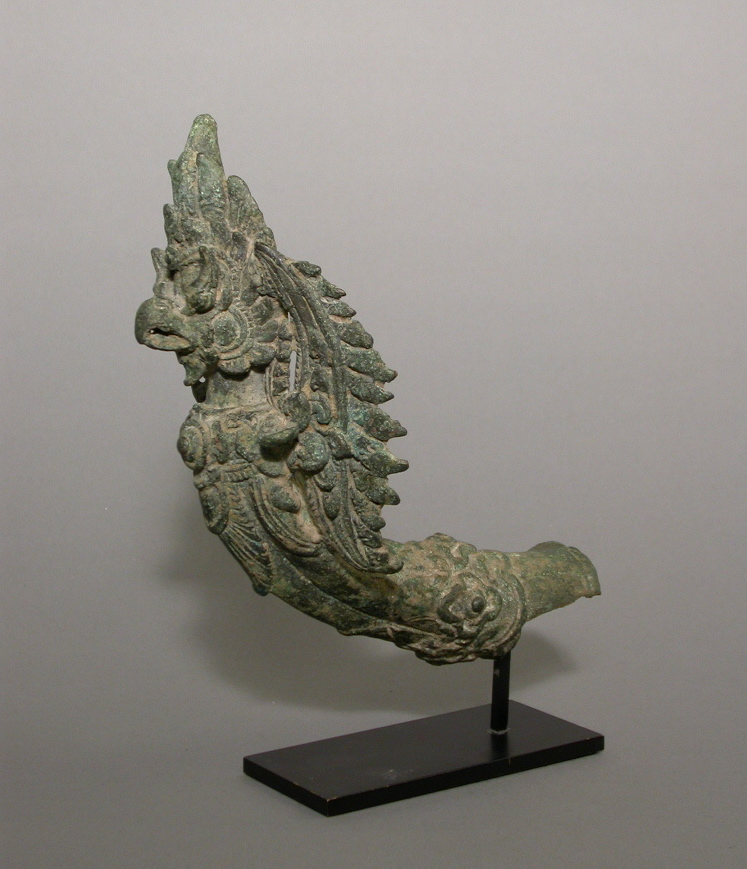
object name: Architectural fragment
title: Garuda Finial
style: Southeast Asian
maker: Cambodia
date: Angkor period, 12th/13th century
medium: Bronze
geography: Cambodia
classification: bronze; metal; decorative object/ornament; asian art; architectural fragment